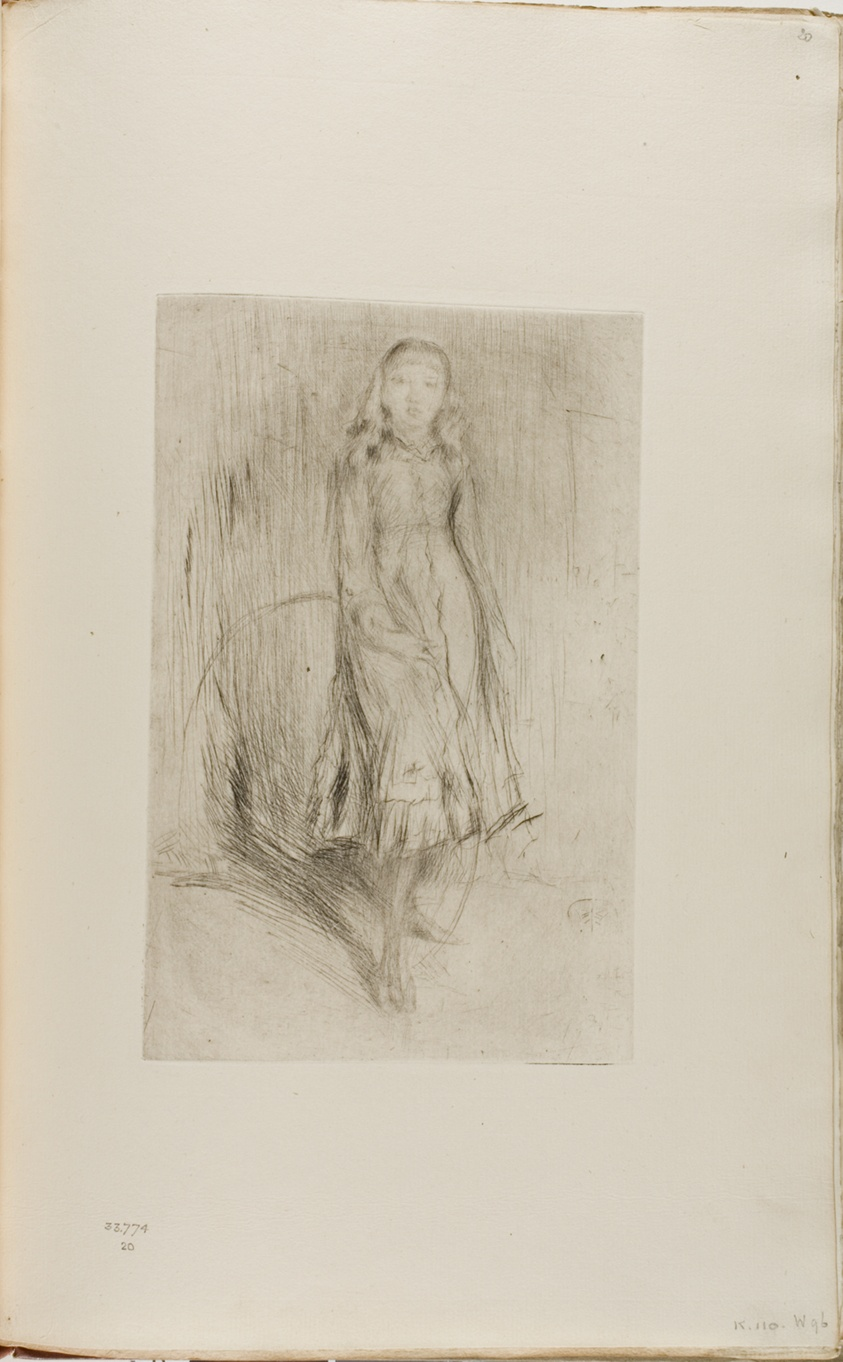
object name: Print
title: Florence Leyland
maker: James McNeill Whistler (American, 1834-1903)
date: 1874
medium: Drypoint with foul biting in black ink on ivory laid paper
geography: United States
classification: drypoint; prints and drawing; book; foul biting; print; paper